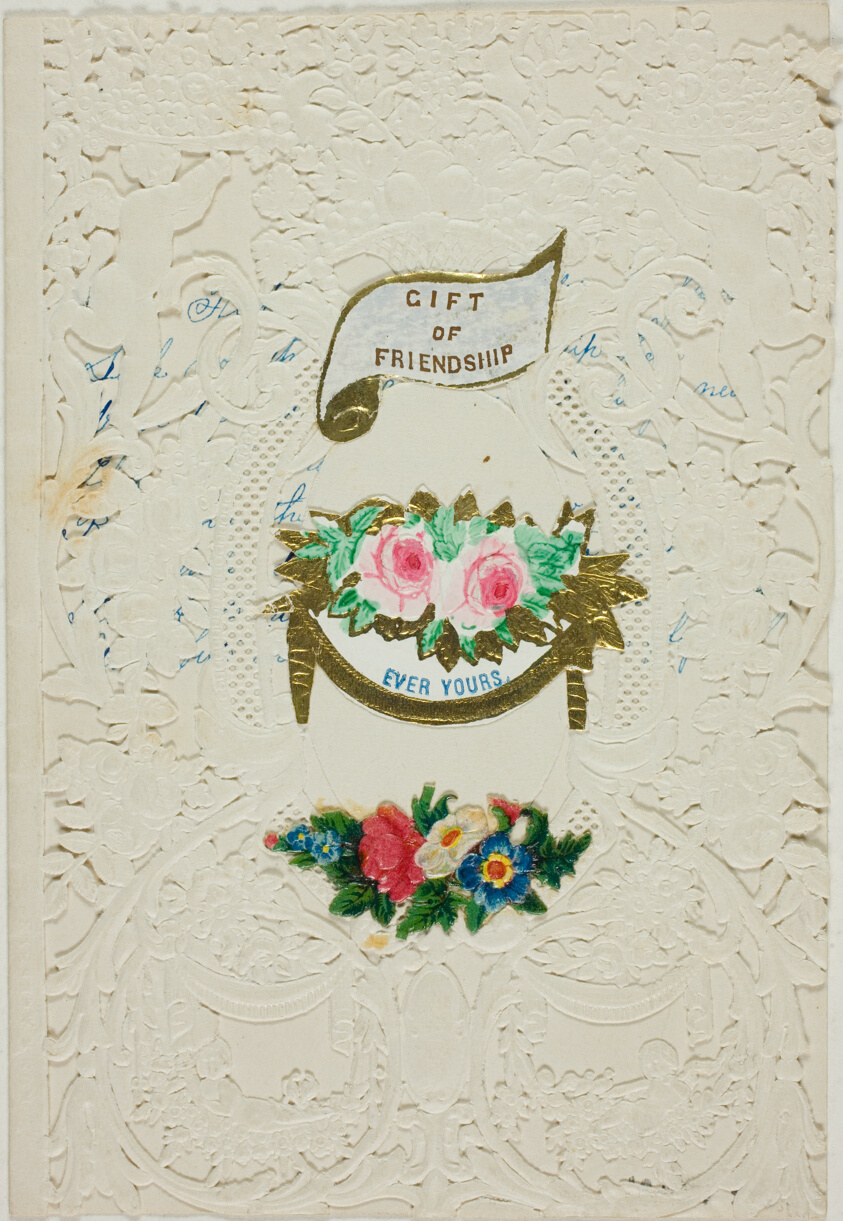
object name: Drawing and Watercolor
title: Gift of Friendship (valentine)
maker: George Kershaw (English, 19th century)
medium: Collaged elements on cut and embossed ivory laid paper (lace)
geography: England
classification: valentine; prints and drawing; paper